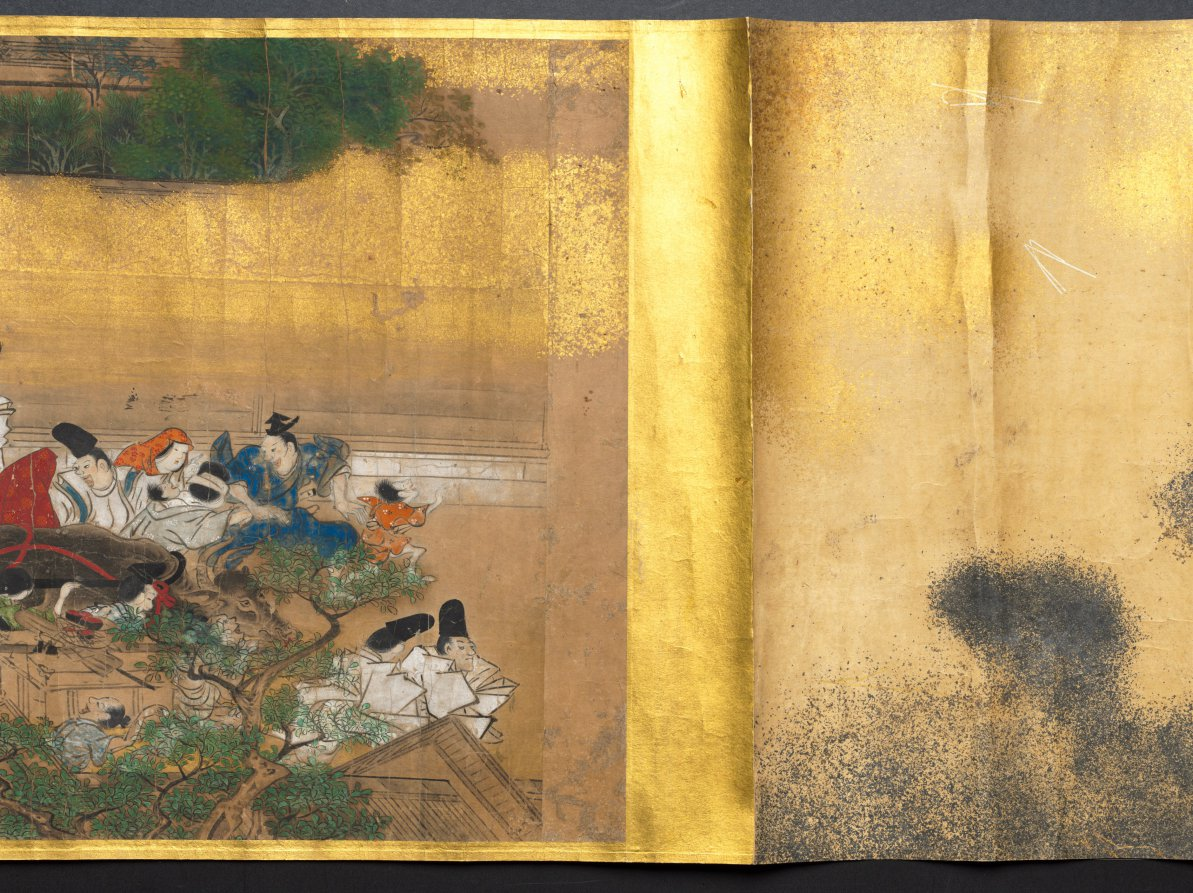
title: People Fleeing from a Fire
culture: Japan, Edo period (1615–1868)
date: 1615–1868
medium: Handscroll; color and gold on paper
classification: Painting